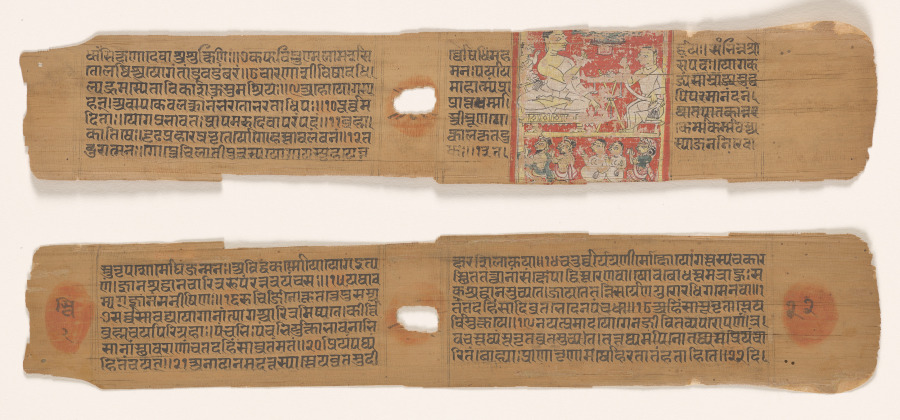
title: Folio 22 from a Yoga-shastra of Hemachandra: Jain Monk with disciple and two laymen, two Nuns, and a laywoman (recto); Text (verso)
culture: Western India, Gujarat, 13th century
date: c. 1275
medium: Gum tempera and ink on palm leaf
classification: Painting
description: This painting, from later in a Sanskrit text on yoga and meditation, shows the transmission of the teaching. The senior monk on a throne, who may also be the text’s author, faces a disciple with a sacred book on a stand under a canopy between them. Below is a pious assembly of lay followers and nuns.